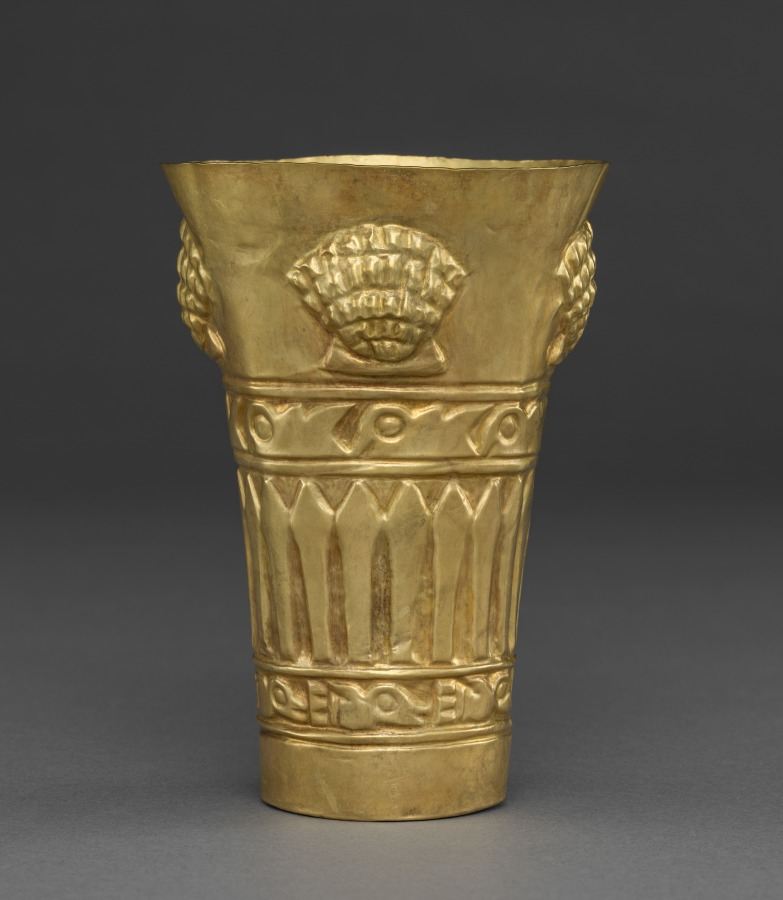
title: Beaker with Shells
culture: Central Andes (Peru), Lambayeque (Sicán) people, 10th century-12th century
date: 900–1100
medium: gold, hammered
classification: Metalwork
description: This beaker was created by an artist of the Lambayeque culture of Peru's north coast. Shells appear in the upper register representing spondylus, the red-orange thorny oyster greatly valued by pre-Hispanic Andean societies. If such beakers were used in life—that is, not created exclusively for the lavish tombs in which they have been found in quantities—they may have figured in feasting events that were central to late pre-Hispanic political, social, and religious life.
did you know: Highly valued as a luxury material, spondylus shells served as symbols of power and prestige.